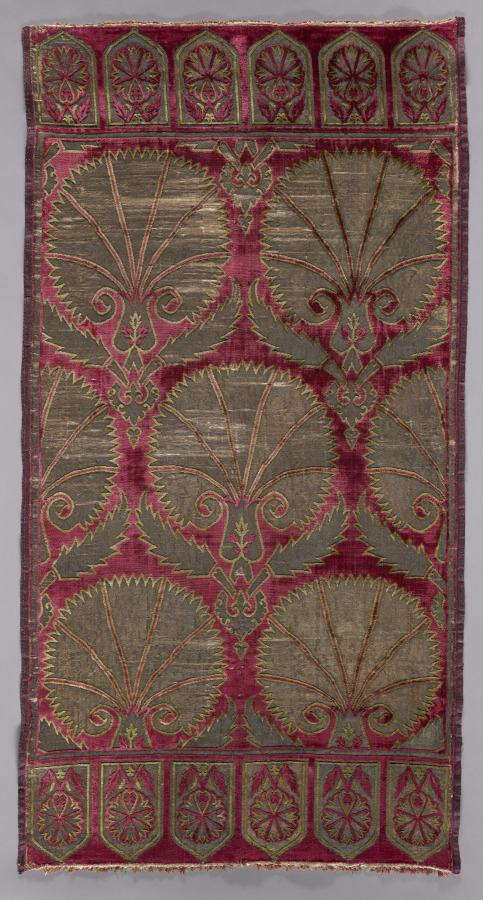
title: Brocaded velvet cushion cover with carnations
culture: Turkey, Bursa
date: late 1500s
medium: velvet, brocaded: silk, gilt-and-silver-metal thread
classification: Velvet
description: The lappet designs on the top and bottom identify this textile as an Ottoman cushion cover for a royal divan, or sofa, used in the royal court. Its bold, graphic pattern is made up of carnations in three staggered rows. Carnations are distinguished from other floral motifs by their sawtooth petals and serrated leaves.